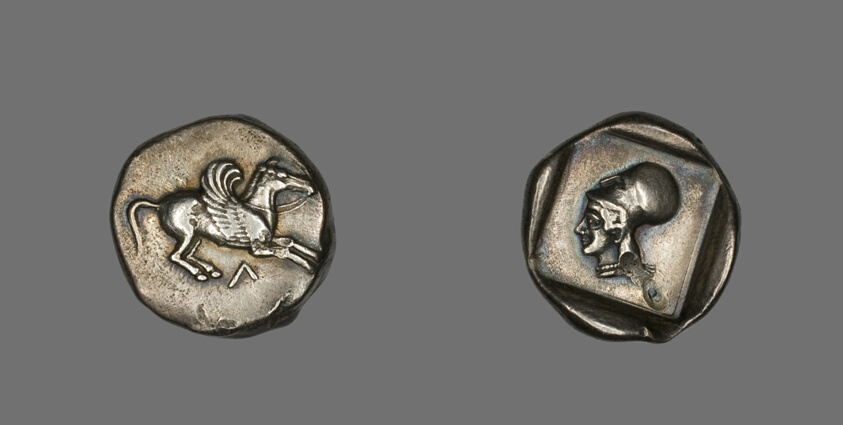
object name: Coin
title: Coin Depicting Pegasus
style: archaic (greek), greek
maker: Greek; Corinth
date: about 500-450 BCE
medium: Silver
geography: Levkás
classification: coin; ancient art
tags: pegasus